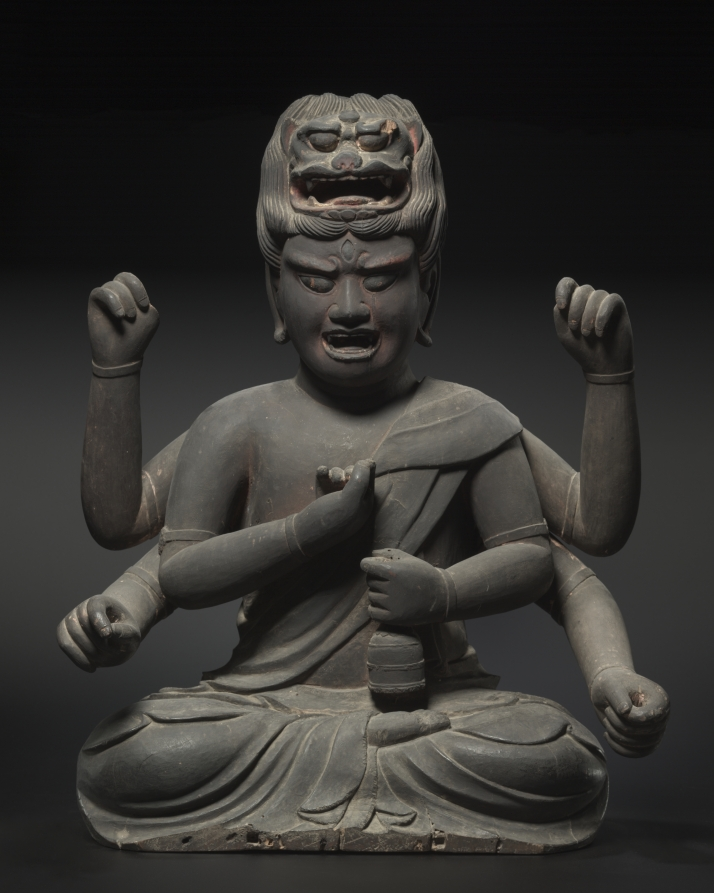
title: Aizen Myōō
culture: Japan, Kamakura period (1185–1333)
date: early 1300s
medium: Wood with black lacquer and red pigments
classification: Sculpture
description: The Buddhist deity Aizen Myōō channels carnal desire into a lust for spiritual enlightenment. In its principal right arm, this figure once held a vajra, a symbolic weapon used to cut through illusion, while its main left arm still grasps the vajra bell rung to bring one to awareness. The lion’s head in Aizen’s hair holds its mouth open to devour thoughts and desires. Holes along the front of the legs show where the sculpture’s base would have been attached.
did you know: The torso, head, and legs of this figure were carved from a single block of wood. Four of the arms were carved separately.